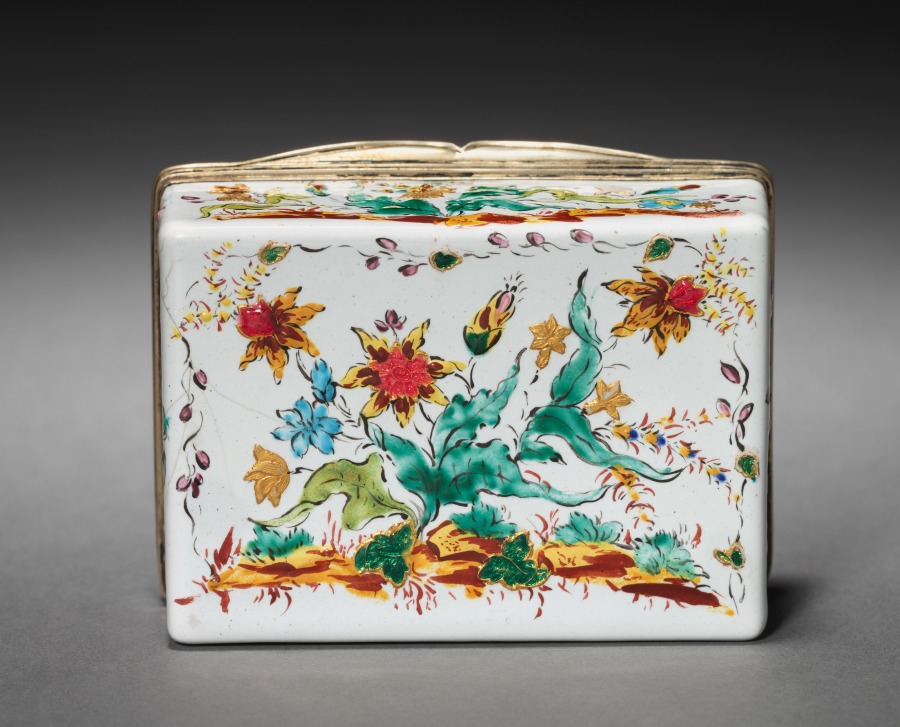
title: Box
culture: France, 18th century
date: 1749–50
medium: silver gilt and enamel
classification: Enamel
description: Chinoiserie in 18th-century France incorporated imitations of East Asian motifs, designs, and ornaments into European art. These imitations were often distorted by the European imagination and were not accurate representations of the cultures from which they drew inspiration. Elements of chinoiserie in this box can be seen primarily on the lid where enormous, vibrantly colored flowers tower over two crouching figures and a grouping of buildings.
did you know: The flower petals on the box lid are raised, an effect produced by drops of transparent enamel placed on the box’s surface that imitates polished gemstones or pearls.